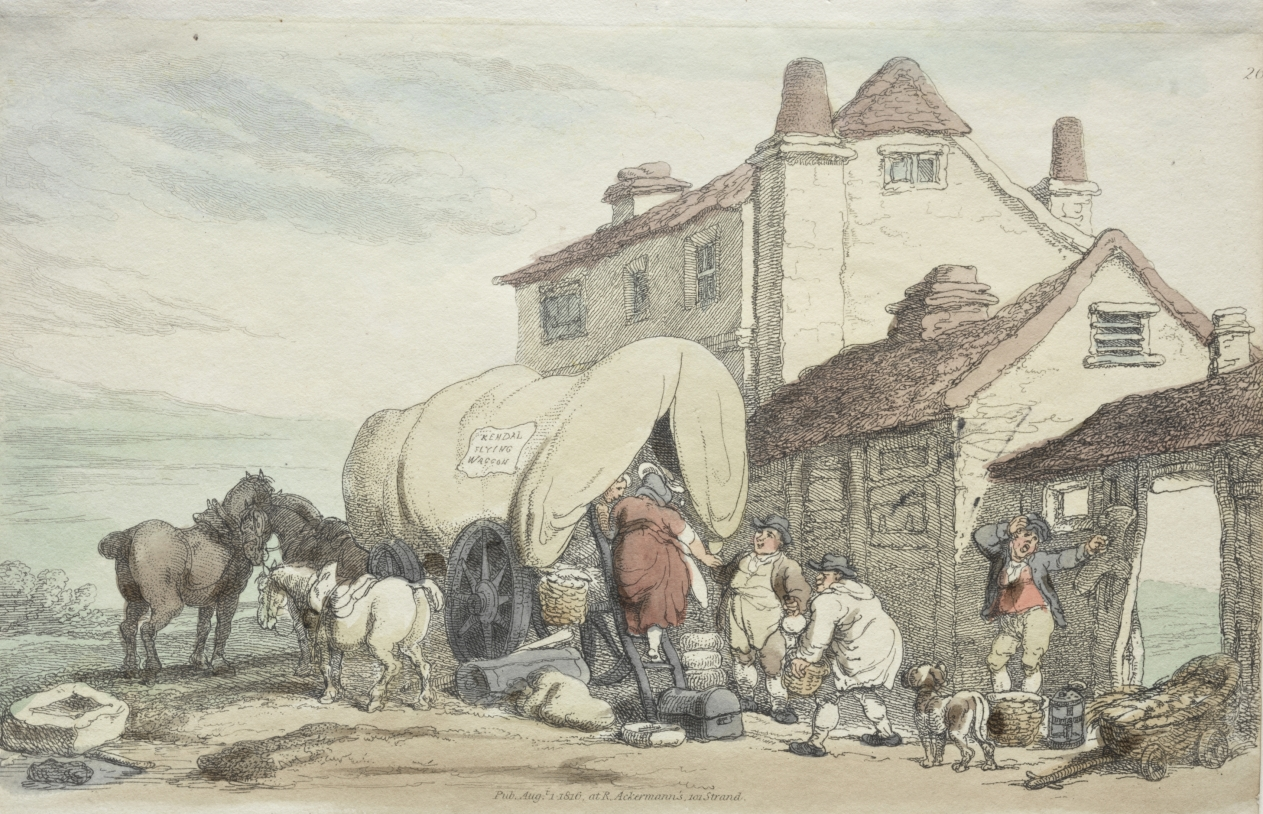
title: Richardson's Show: A Flying Wagon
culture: England, 19th century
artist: Thomas Rowlandson (British, 1756–1827)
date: 1816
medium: etching, hand colored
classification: Print